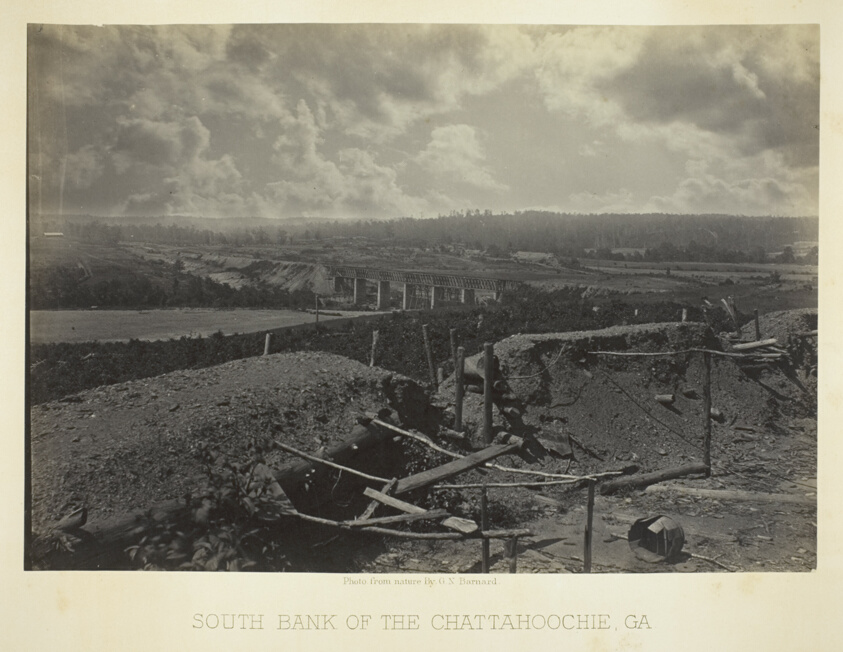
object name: Photograph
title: South Bank of the Chattahoochie, Ga.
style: 19th century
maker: George N. Barnard (American, 1819–1902)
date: 1866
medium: Albumen print, plate 33 from the album "Photographic Views of the Sherman Campaign" (1866)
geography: United States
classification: albumen silver print; photographic process; photography; photograph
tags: Collected by Hugh Edwards, Sherman's Campaign 1866